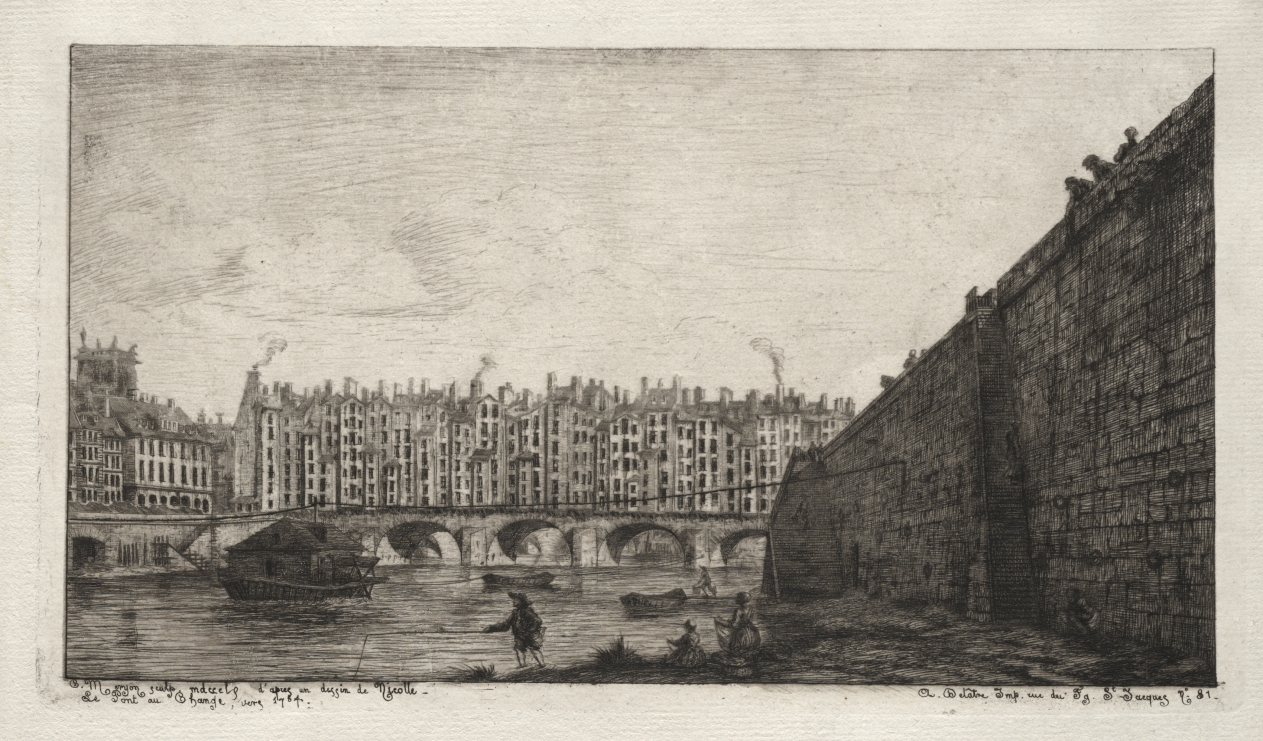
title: The Exchange Bridge, Paris, about 1784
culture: France, 19th century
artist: Charles Meryon (French, 1821–1868)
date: 1855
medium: etching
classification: Print